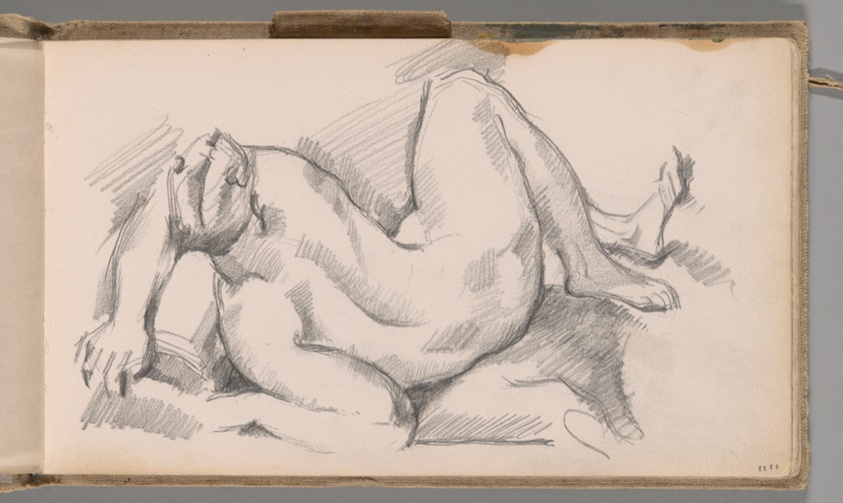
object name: Drawing and Watercolor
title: Sketchbook No. 2 (L'Estaque)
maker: Paul Cézanne; French, 1839-1906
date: 1875–86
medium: Graphite and pen and ink drawings on paper, bound into a book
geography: France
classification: sketchbook; graphite; prints and drawing; paper